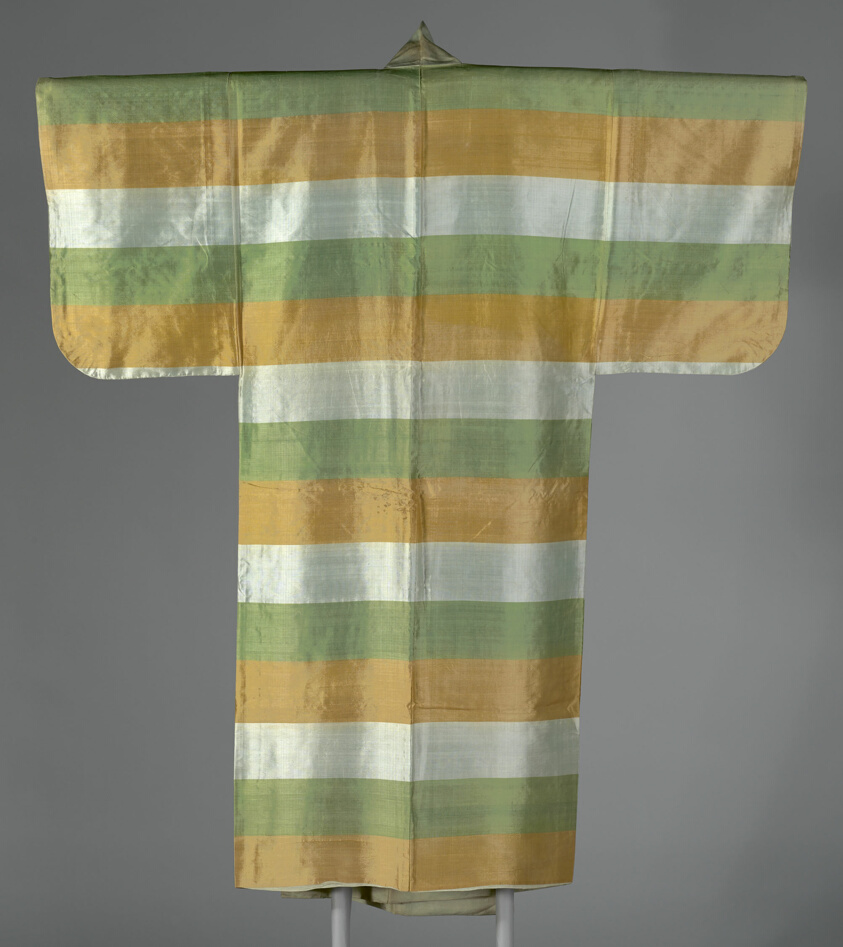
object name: Costume and Accessories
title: Noshime (Male Noh Costume)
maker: Japan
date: 2nd half of the 18th century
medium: Silk, plain weave; lined with silk plain weave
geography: Japan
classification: weaving; costume